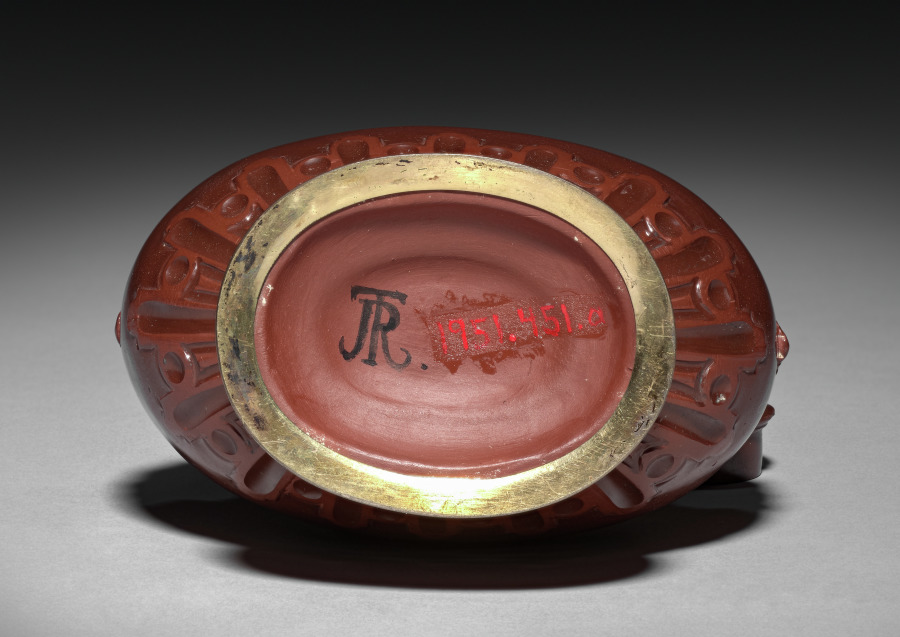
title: Pilgrim Bottle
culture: Germany, Meissen, 18th century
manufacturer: Meissen Porcelain Factory (German, est. c. 1710)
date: c. 1715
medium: polished red stoneware, silver-gilt mounts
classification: Ceramic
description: Throughout the early 1700s porcelain was imported to Europe from China and Japan, until the correct formula to produce it was developed by Johann Friedrich Böttger and a collaborator, which led to the establishment of the Meissen factory in 1710. Red stoneware inspired by Chinese Yixing ware and white porcelain were produced in Meissen under Böttger. Its fine red stoneware was so hard that it could be polished on a lapidary’s wheel—as was the body of this bottle.